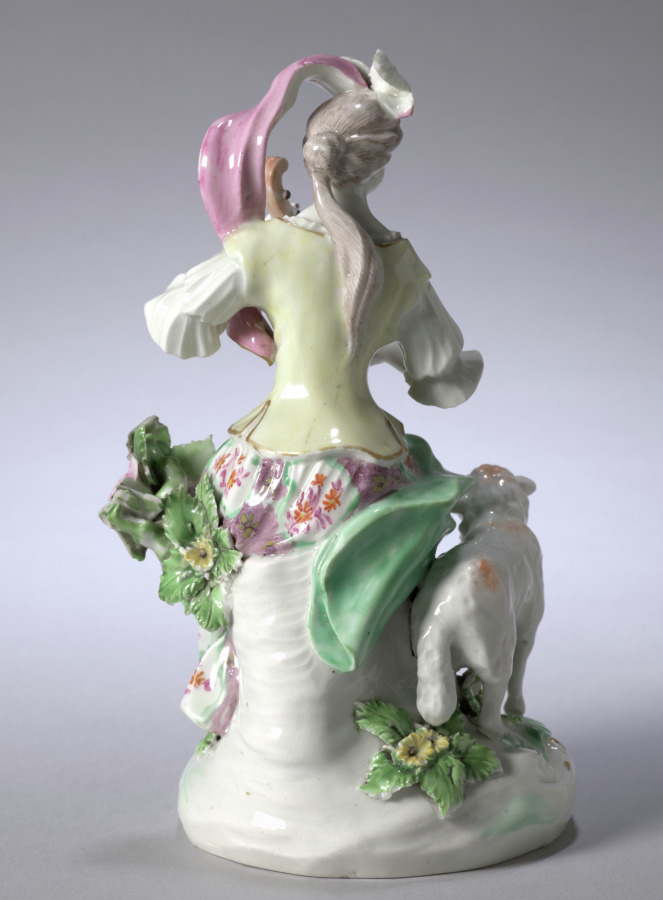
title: Seated Musician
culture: England, Derby, 18th century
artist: Derby Porcelain Factory (British)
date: c. 1765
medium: soft-paste porcelain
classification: Ceramic